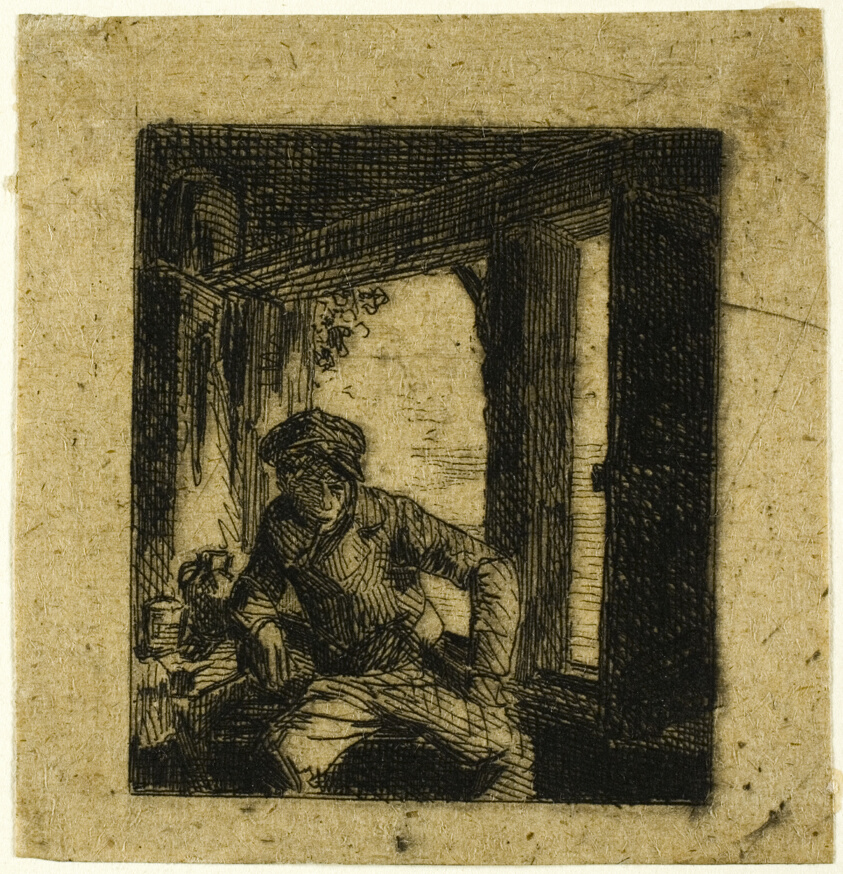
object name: Print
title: Drinker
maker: Charles Émile Jacque (French, 1813-1894)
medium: Etching on tan chine laid down on ivory laid paper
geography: France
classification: etching; print; prints and drawing